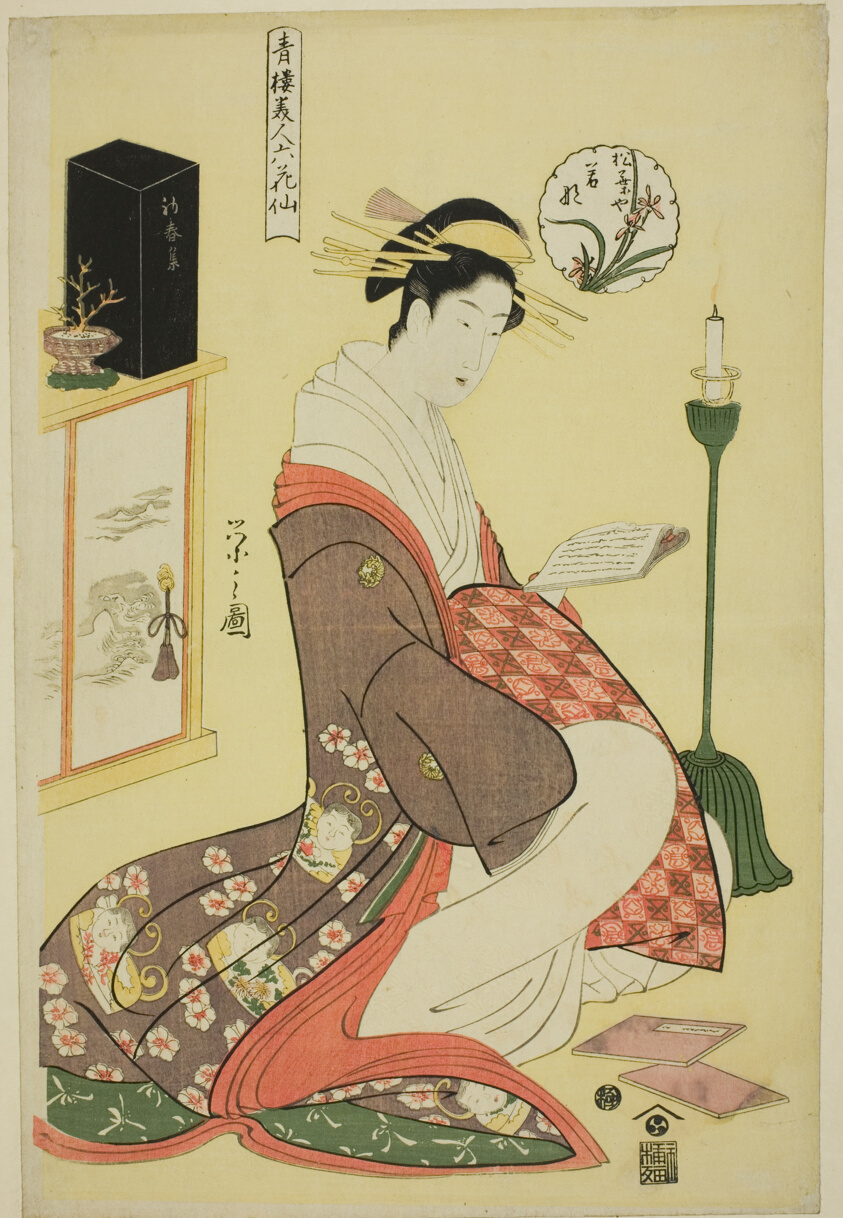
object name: Print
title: Wakana of the Matsubaya, from the series "Beauties of the Pleasure Quarters as the Six Floral Immortals (Seiro bijin rokkasen)"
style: Japanese (culture or style)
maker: Chobunsai Eishi; Japanese, 1756-1829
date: c. 1794/95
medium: Color woodblock print; oban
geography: Japan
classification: woodblock print; print; asian art